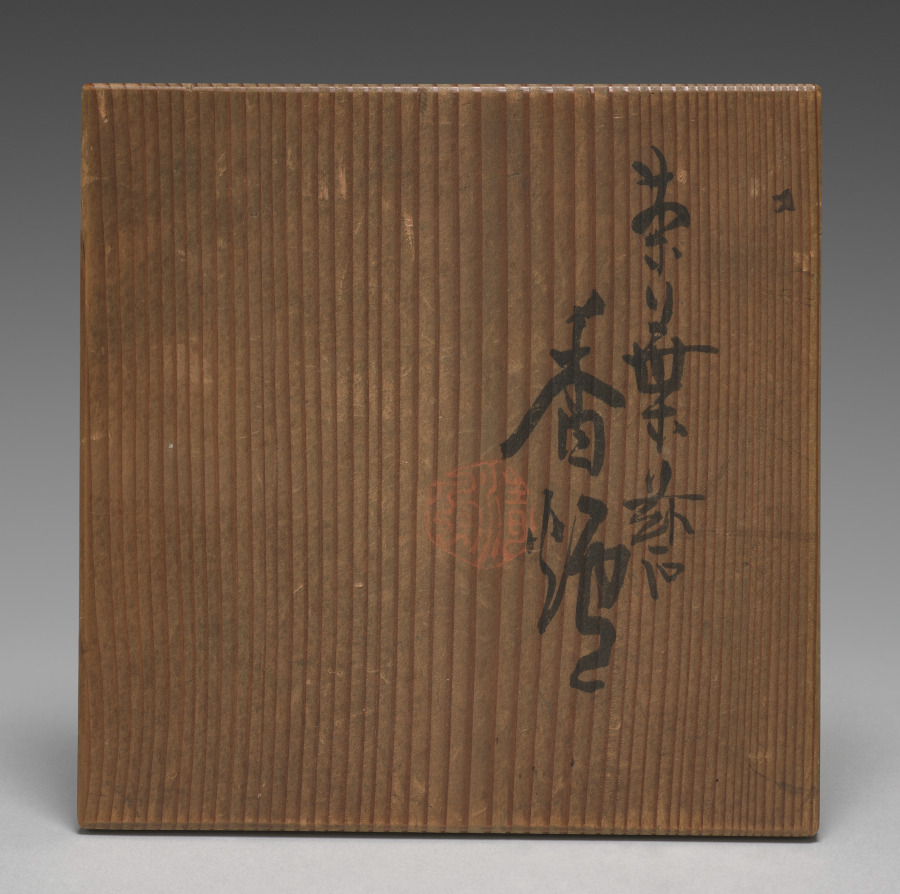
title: Incense Burner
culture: Japan, Meiji period (1868–1912)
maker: Seifū Yohei III (Japanese, 1851–1914)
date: 1895–1914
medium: Porcelain with tea-leaf colored glaze and molded design and geometric openwork silver lid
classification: Ceramic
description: Kyoto-based Japanese ceramist Seifū Yohei III (1851–1914) admired the glaze colors found on Chinese porcelain and tried to replicate them through intensive experimentation. His green and creamy white glazes were particularly well received. The combinations of colors with subtle molded and incised decorations in his ceramics respond powerfully to changes in light, creating a dynamic viewing experience. Names for the glazes, written in ink with a brush on the lids of the custom-made storage boxes for the works, often indicate a specific glaze or ware that had inspired him, even when the resulting color was distinctively his own.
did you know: This incense burner with a geometric-patterned silver lid has a glaze identified on its box lid as “tea leaf [color–glazed] porcelain” (chayōji).